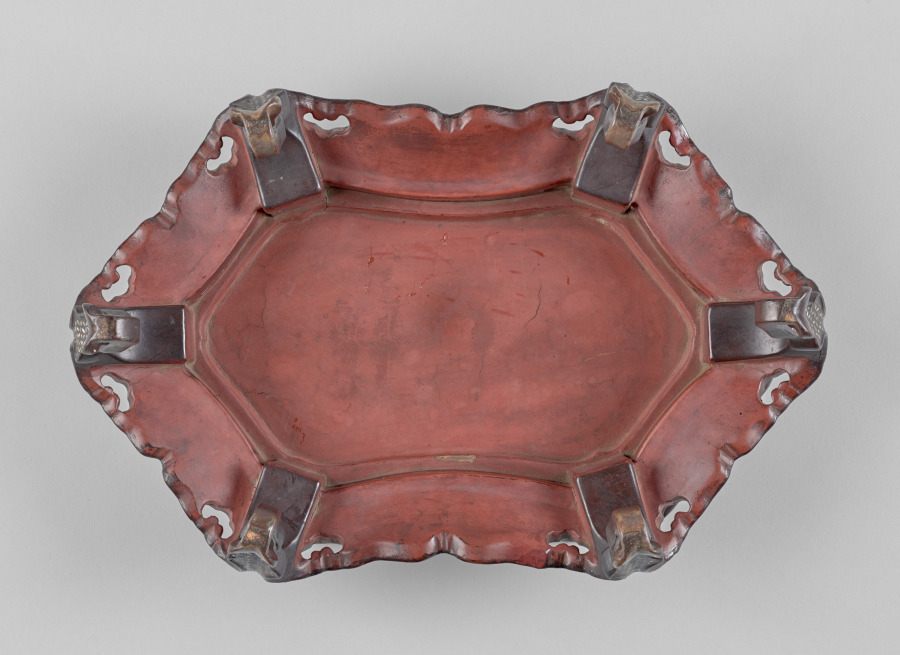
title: Hexafoil-Shaped Table with Mother-of-Pearl Inlay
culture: Korea, Joseon dynasty (1392–1910)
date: late 1400s–early 1500s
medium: Inlaid abalone shells on black lacquer ground, applied with red lacquer on the interior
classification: Lacquer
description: This low table showcases intricate mother-of-pearl and twisted brass-wire inlay forming chrysanthemum scrolls and floral lattices against black lacquer. As one of the few surviving early Joseon lacquer works employing the rare brass-wire technique, it reflects refined craftsmanship made for elite patrons. Likely used in Buddhist offering ceremonies, it would have supported precious ritual objects such as rolls of sutras or miniature Buddhist statuary.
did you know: The use of inlaid twisted brass wires in this mother-of-pearl lacquer table was first introduced in the twelfth century and is believed to have been employed in high-quality lacquerware through the end of the fifteenth century.